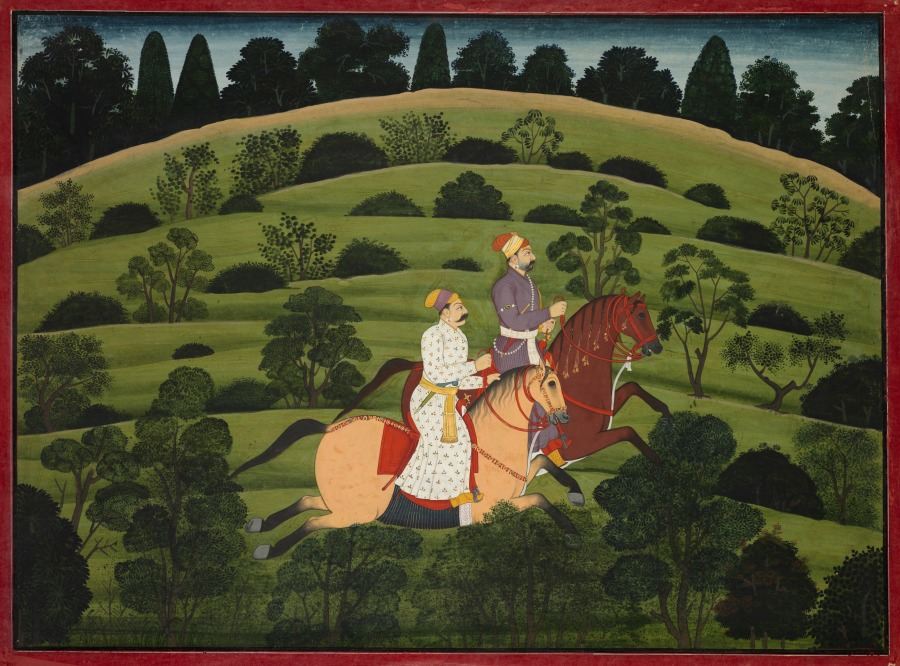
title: Akrura and Kritavarma flee Dvaraka, page from the "Large Basohli Bhagavata Purana"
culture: Northern India, Pahari kingdoms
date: c. 1760–65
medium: Gum tempera and ink on paper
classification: Painting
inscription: akrūraḥ kṛtavarmā ca śkatvā śatadhanurvadhaṃ || gūṣatur bhayavitrastau dvārakāyāḥ ||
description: Two warriors flee from Krishna’s capital city on horseback in a scene that takes place late in the life of Krishna. They were responsible for the death of Krishna’s father-in-law, King Satrajit. Furthermore, one of them is carrying the infamous Syamantaka jewel, stolen from King Satrajit. This magical jewel, a gift from the sun god, has the power to produce 170 pounds of gold every day. They are afraid of Krishna’s wrath.